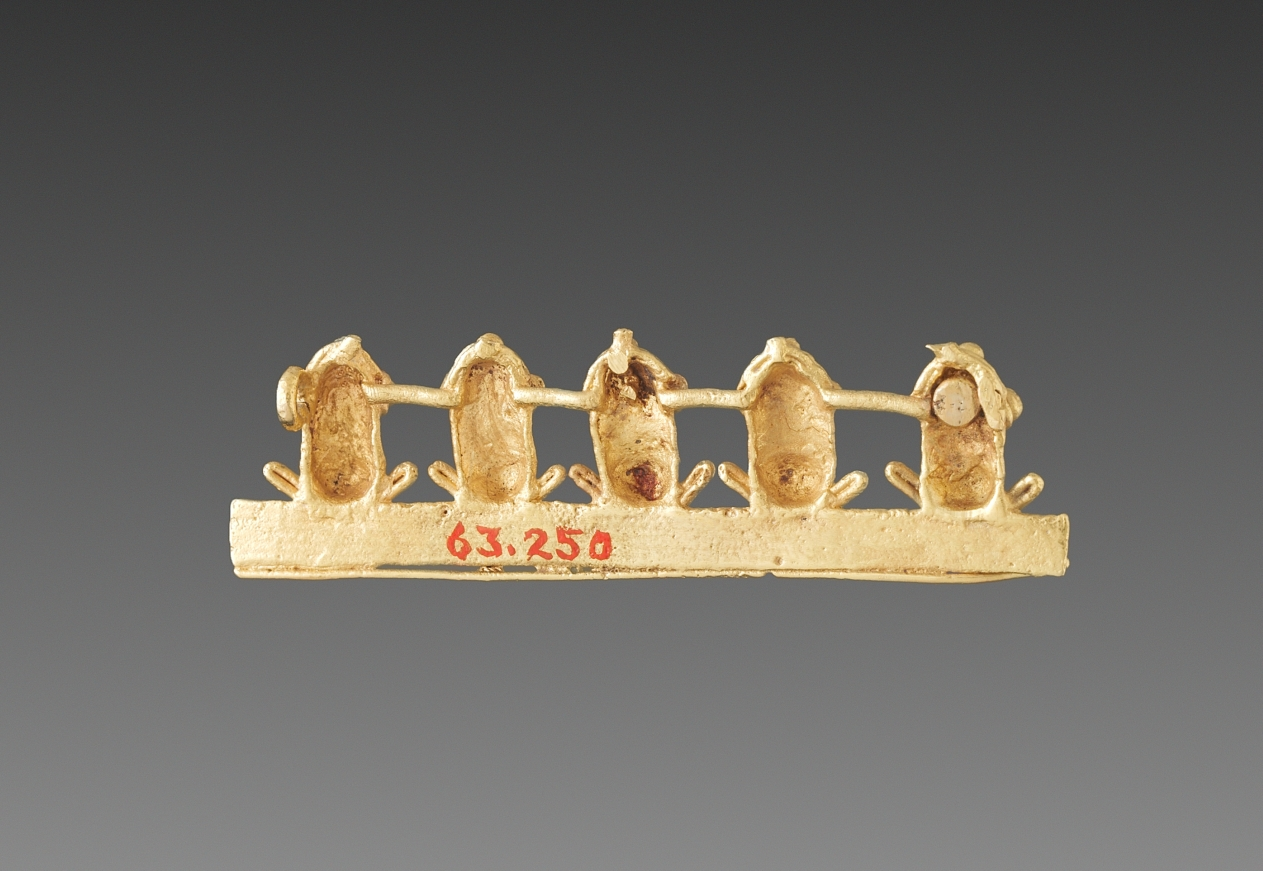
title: Frog Pendant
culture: Panama, Veraguas-Chiriquí style, 11th-16th century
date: c. 1000–1550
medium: cast gold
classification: Metalwork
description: In general, frogs and toads symbolize life-giving water and the green growth it promotes. More surprising is their mythical role as keepers or donors of fire, an association perhaps enhanced by the bright colors that many frogs "flash" when startled, a form of protection. Brightly colored frogs, including those with golden tones, also produce very poisonous toxins, which in part led to a final connection with the underworld and death.